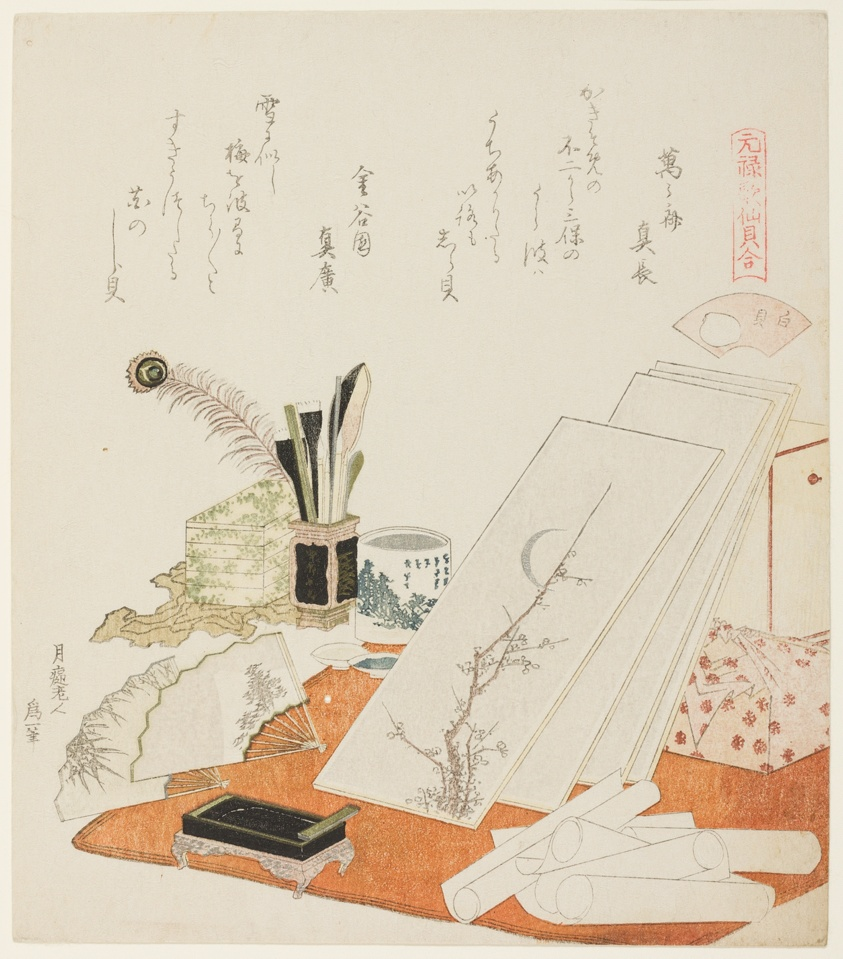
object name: Print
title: The Studio, illustration for The White Shell (Shiragai), from the series "A Matching Game with Genroku-period Poem Shells (Genroku kasen kai awase)"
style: Japanese (culture or style)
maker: Katsushika Hokusai 葛飾 北斎; Japanese, 1760–1849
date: 1821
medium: Color woodblock print with metallic pigments and blindprinting; surimono shikishiban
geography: Japan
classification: woodblock print; print; asian art